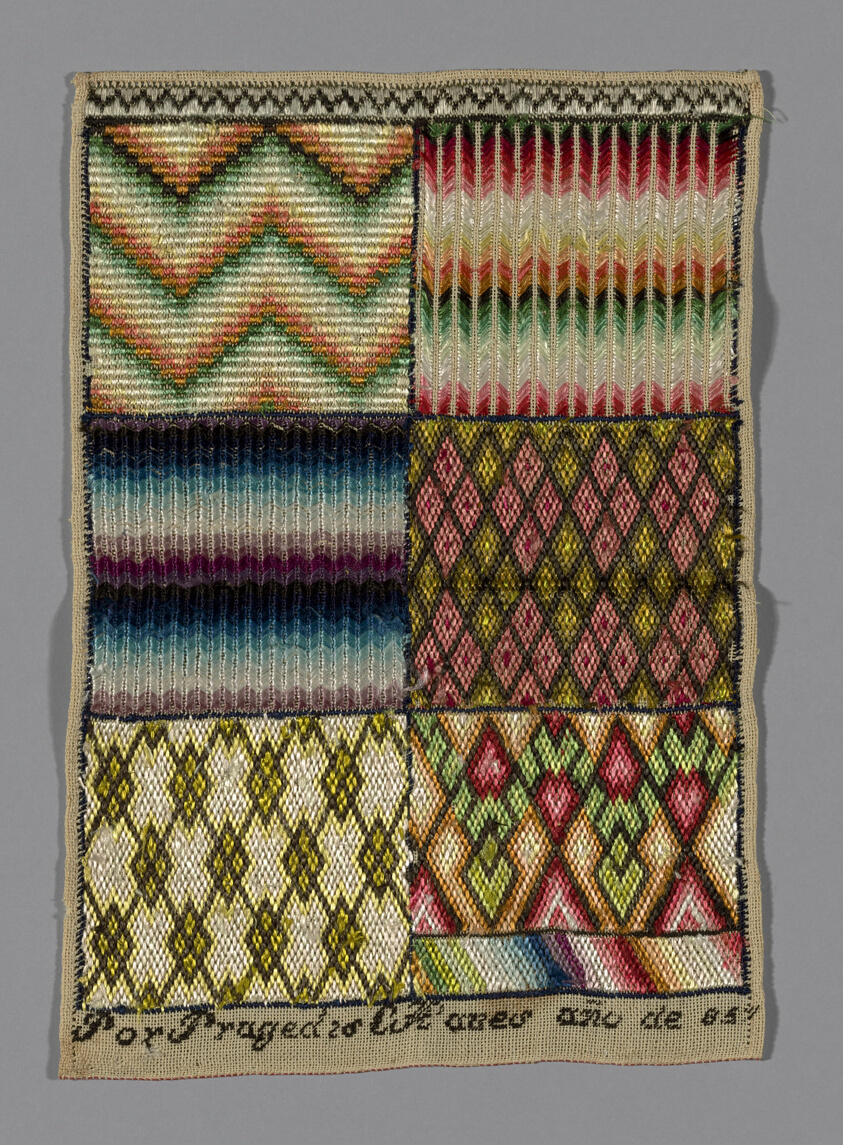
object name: Textile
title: Sampler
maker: Spain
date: 19th century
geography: Spain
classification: textile; needlework (visual works); sampler